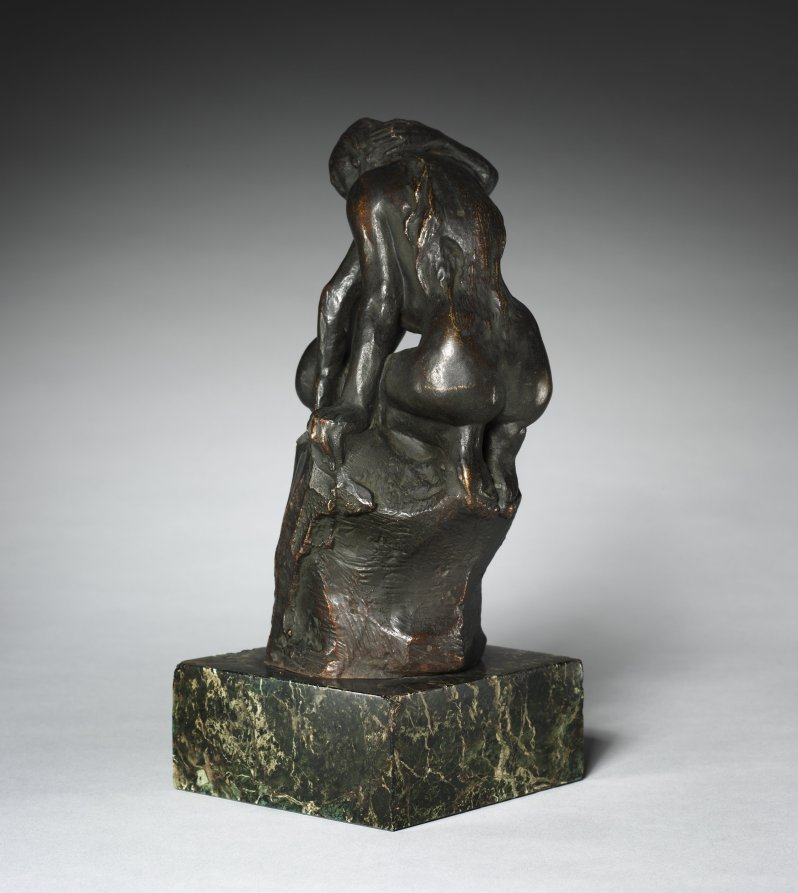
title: Young Girl Confiding Her Secret to Isis (Jeune fille confiant son secret à Isis)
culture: France, 19th century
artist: Auguste Rodin (French, 1840–1917)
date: 1899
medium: bronze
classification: Sculpture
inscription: Inscribed in area below larger figure's left hand and smaller figure's right hand: "Rodin"; below feet of larger figure: "L. Persinka, Fondeur, Versailles"